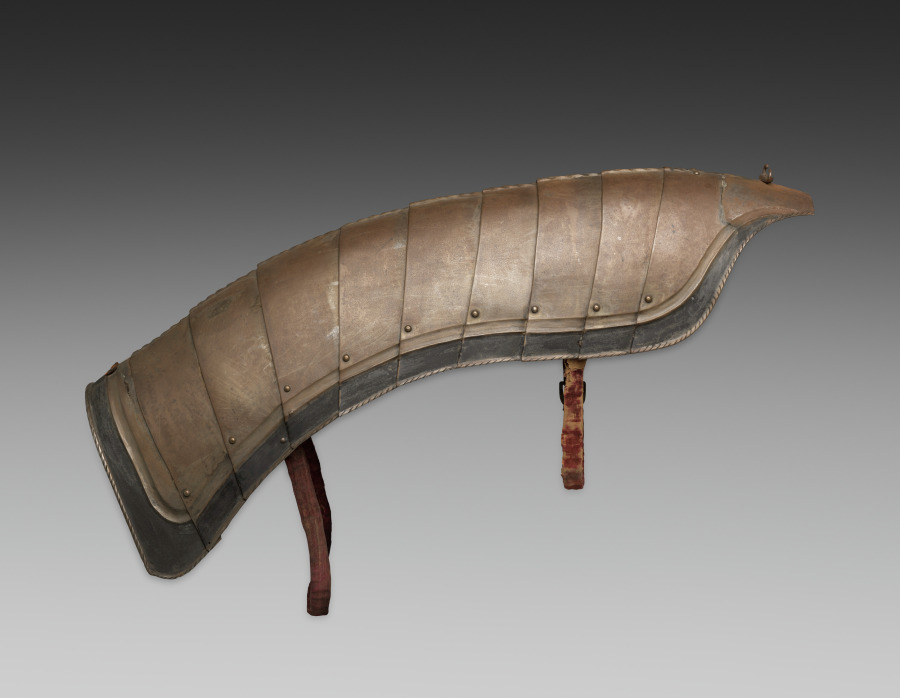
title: Horse's Crinet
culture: Germany, 19th century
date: 1801–1900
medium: steel with black paint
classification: Arms and Armor